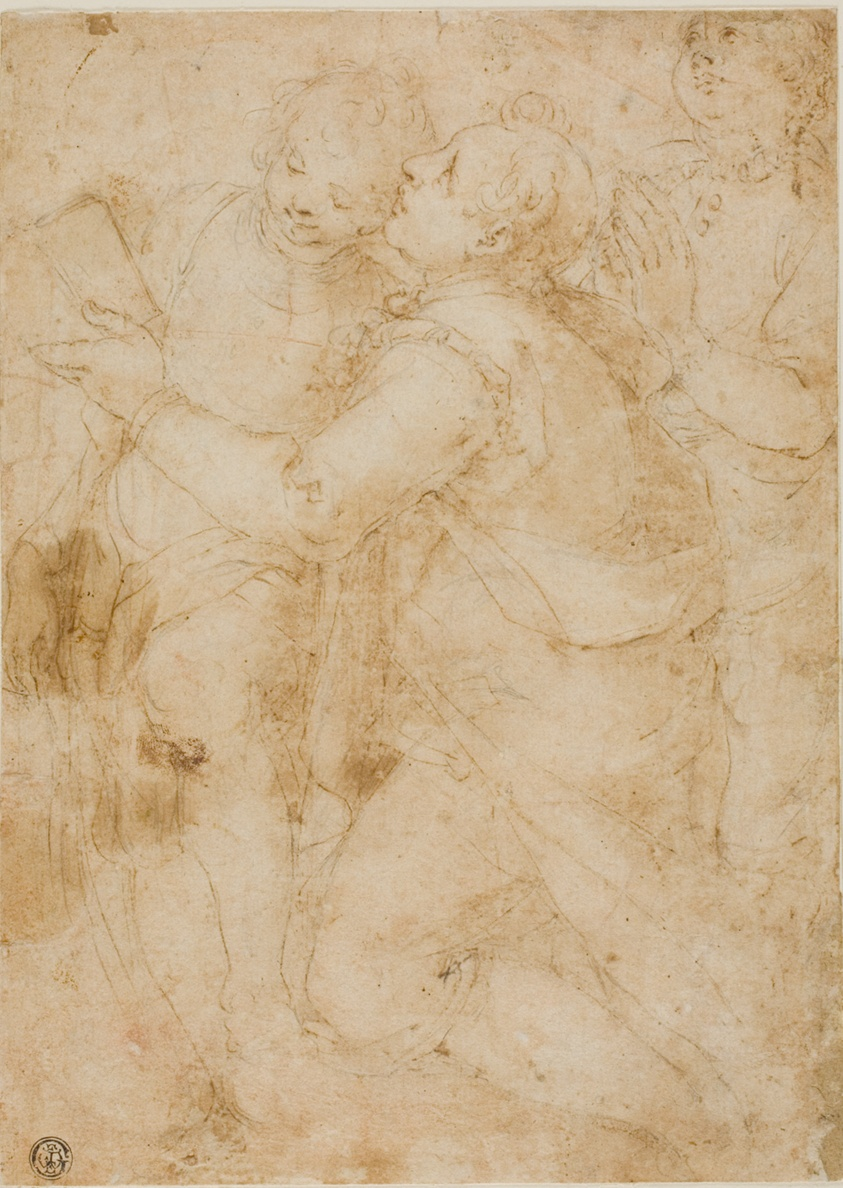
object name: Drawing and Watercolor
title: Three Youths in Prayer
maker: Guglielmo Caccia (Italian, 1568-1625); or Orazio Samacchini (Italian, 1532-1577); or Denys Calvaert (Flemish, c.1540-1619); or Jacoo Bassano (Italian, c.1510-1592)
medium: Pen and brown ink, with brush and pale brown wash, over black chalk, on buff laid paper, laid down on ivory wove paper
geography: Italy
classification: pen and ink drawings; drawings (visual works); prints and drawing